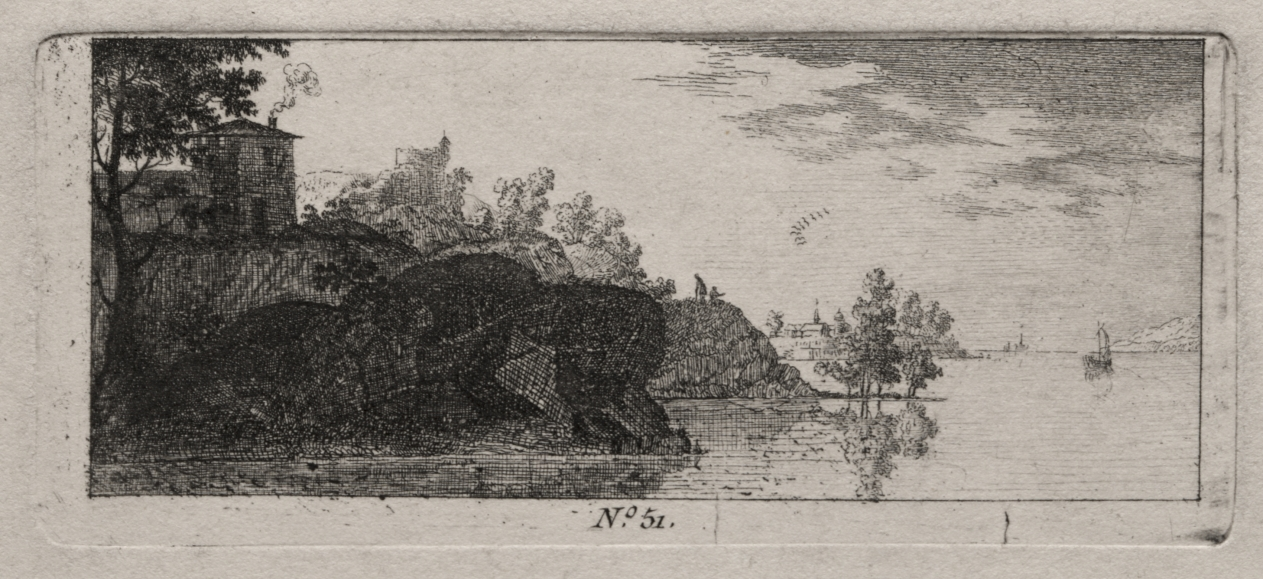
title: Cottage on a Rocky Promentory along a River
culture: France, 18th century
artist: Antoine de Marcenay de Ghuy (French, 1724–1811)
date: 1778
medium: etching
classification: Print